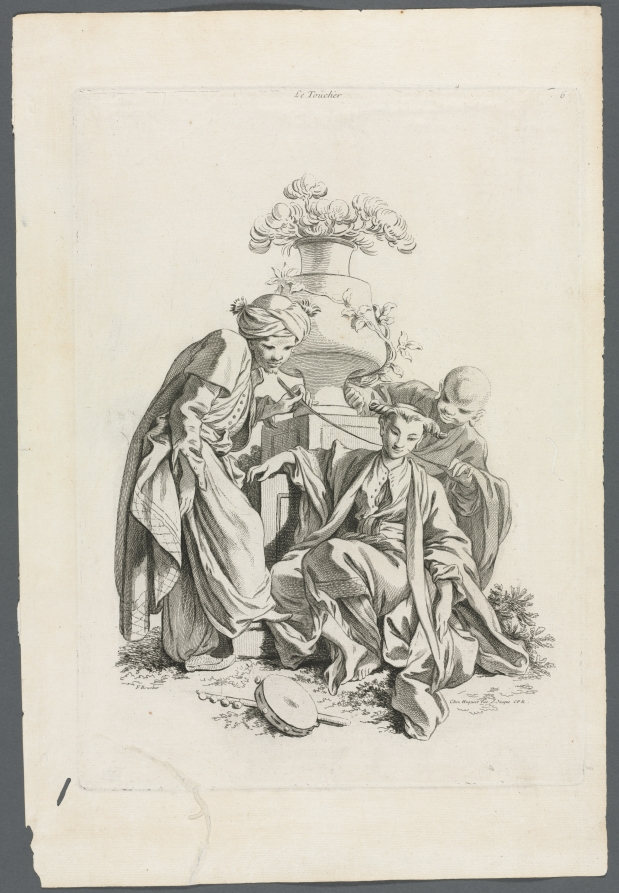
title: The Senses: Touch (after Boucher)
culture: France, 18th Century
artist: Gabriel Huquier (French, 1695–1772)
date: 1700s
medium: etching and engraving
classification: Print